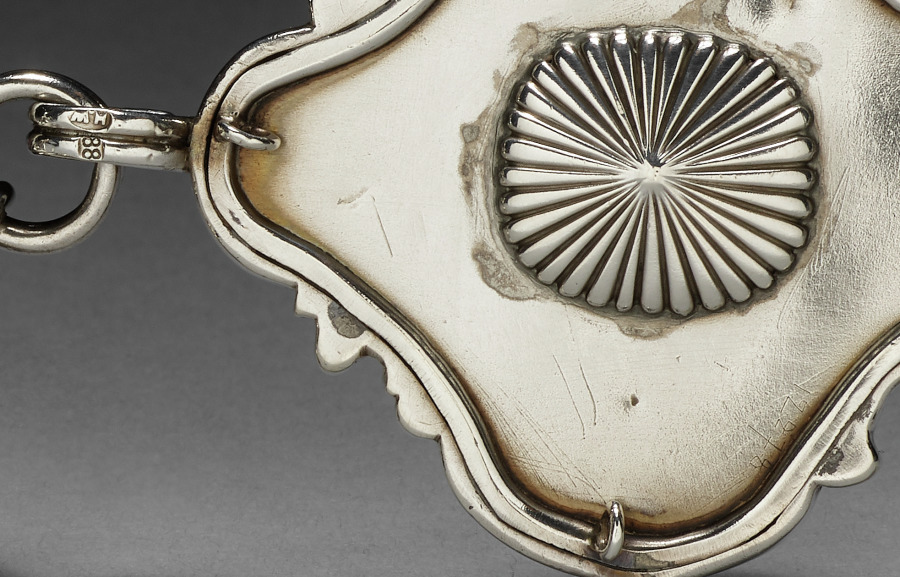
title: Cloak Clasp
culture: Russian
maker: House of Fabergé (Russian, 1842–1918)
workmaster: Henrik Wigström (Russian, 1862–1923)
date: c.1903–8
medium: aquamarine, half pearl bezel, oyster guilloché enamel, silver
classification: Jewelry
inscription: Inscribed with the Cyrillic initials “HW”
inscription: “88” silver standard